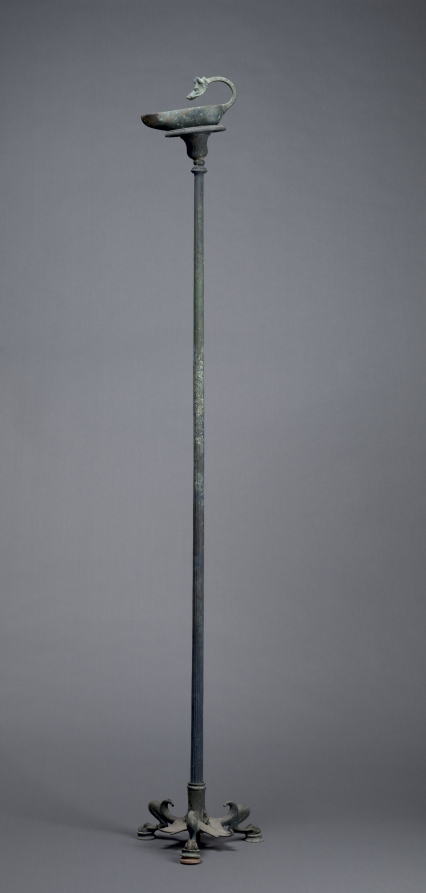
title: Candelabrum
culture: Italy, Roman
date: 100–1 BCE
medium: bronze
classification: Sculpture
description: This bronze is a candelabrum, or ancient lamp stand. A long, fluted column extends from a base on lion or panther paw feet, with ivy leaves between. Atop the column sits a miniature bronze krater, a mixing vessel for wine, with a circular top which supports a separately made lamp. Wealthy Romans would light their homes with bronze oil lamps. The small, portable lamps would be placed on lampstands like this one to light larger spaces.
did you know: This lamp and stand were not found together, but illustrate how they would have been used in antiquity.